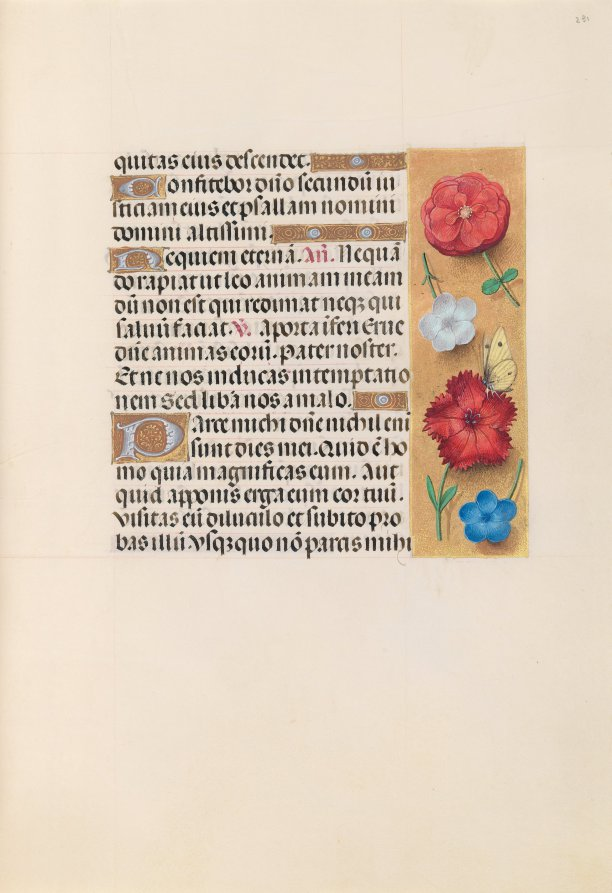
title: Hours of Queen Isabella the Catholic, Queen of Spain: Fol. 231r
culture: Flanders, Ghent and Bruges, late 15th century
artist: Master of the First Prayerbook of Maximillian (Flemish, c. 1444–1519)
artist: and Associates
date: c. 1500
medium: ink, tempera, and gold on vellum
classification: Bound Volume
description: This manuscript was illuminated by a circle of at least five highly organized manuscript painters active in the Flemish cities of Ghent and Bruges. The principal illuminator was Alexander Bening, who painted the majority of the book's miniatures. Manuscripts produced by this circle of artists are renowned for the decoration of their borders, which typically feature a rich variety of realistically-painted flowers, birds, and butterflies. This prayer book, called a book of hours, was intended not for a cleric, but for the private devotions of a lay person-in this case, Isabella the Catholic, Queen of Spain (1451-1504). Isabella's coat of arms embellishes the book's frontispiece. It is unlikely that the book was commissioned by the Queen herself; rather, she probably received it as a diplomatic gift from someone courting her patronage, perhaps Cardinal Francisco Jimenez de Cisneros. A Franciscan friar, Jimenez was dependent upon Isabella for his advancement, first to the post of Queen's confessor in 1492, and then to Archbishop of Toledo in 1495.